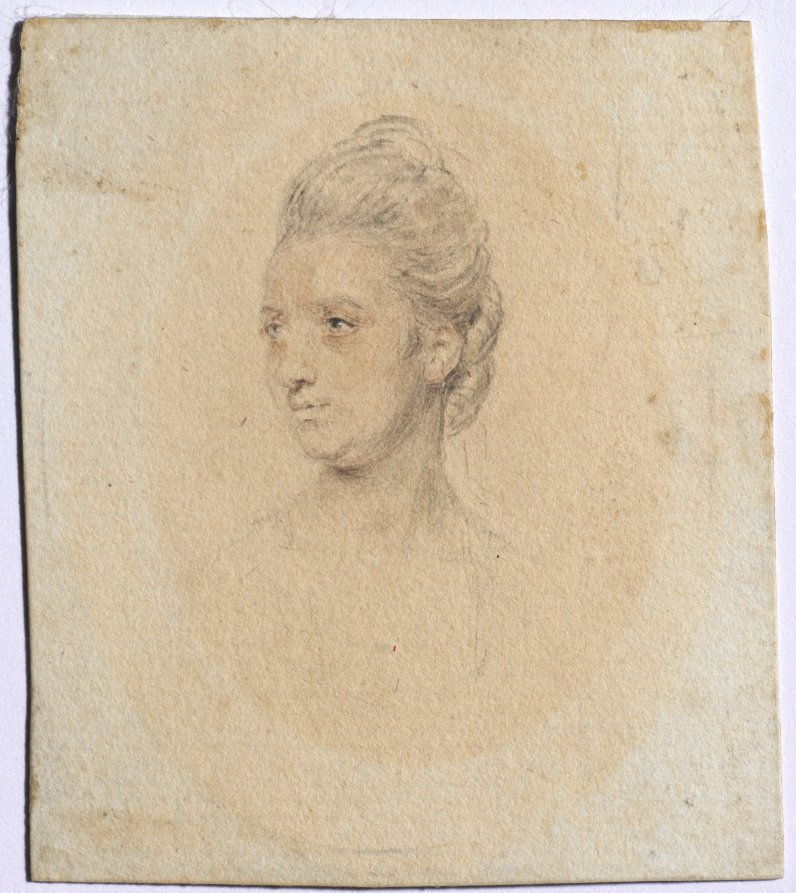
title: Portrait of a Woman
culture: England, 18th century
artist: John I Smart (British, 1741–1811)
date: c. 1772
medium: graphite and wash on laid paper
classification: Portrait Miniature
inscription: inscribed on paper backing: in graphite, upside down at top: 134; in graphite on slant below center: Eleanor of / Spain; on the inside of the outside backing, in center in graphite: M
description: Although it is impossible to say if it was always part of the artist’s process to execute a preparatory sketch prior to painting each miniature, we do know that John Smart retained many hundreds of these sketches. A group of preparatory sketches—of which this portrait is one—descended through the Smirke family after Smart’s daughter Sarah gave a sketchbook containing preparatory portrait studies to her friend Mary Smirke, sister of the celebrated Victorian architect Sydney Smirke. This book was probably broken up around 1877 when it was divided between Sydney’s daughters Mary Jemmett and Mrs. Lange, whose portions were both sold at auction in 1928. This portrait was assigned the historically colorful but fictitious title of “Eleanor of Spain” at some point after memory of its true identity had been lost. Giving illustrious titles to portraits of unknown sitters was a popular strategy adopted by dealers during the nineteenth and twentieth centuries, often applied to miniature portraits and, in particular, to Smart’s sketches of women. The inscription on the paper backing is not in Smart’s hand, and when the paper backing was removed in 1993, no inscriptions were discovered on the back of the drawing itself. Only the sitter’s head and neck are drawn, and a low-necked dress is faintly suggested. Her head is turned to the right, and her light-colored hair is dressed high, with flat curls against the back of her head. She has blue eyes, and the color of her lips is extremely faded, as is the miniature overall. The sitter’s sagging jaw line and the lines beneath her eyes suggest that she was painted as a mature woman. The background is unpainted. A photograph of this sketch in Edward Greene’s notebook indicates that at one time “134” was inscribed on the front in the upper right corner. To this date, the finished ivory for which this preparatory sketch was presumably undertaken has not been discovered. A miniature from the Nelson-Atkins Museum of Art’s Starr collection, while probably not this sketch’s finished ivory counterpart, is closely related in style and date. The Nelson-Atkins unidentified sitter’s veiled hairstyle, position of the head in relation to her squared shoulder, and plump jaw line are identical to the Cleveland sketch. During this stage of Smart’s career, the sitters’ heads were often rather large in relation to their bodies.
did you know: Sketches helped John Smart work out the particulars of a portrait before commencing the miniature on ivory; they were useful in the event that a duplicate might later be required.